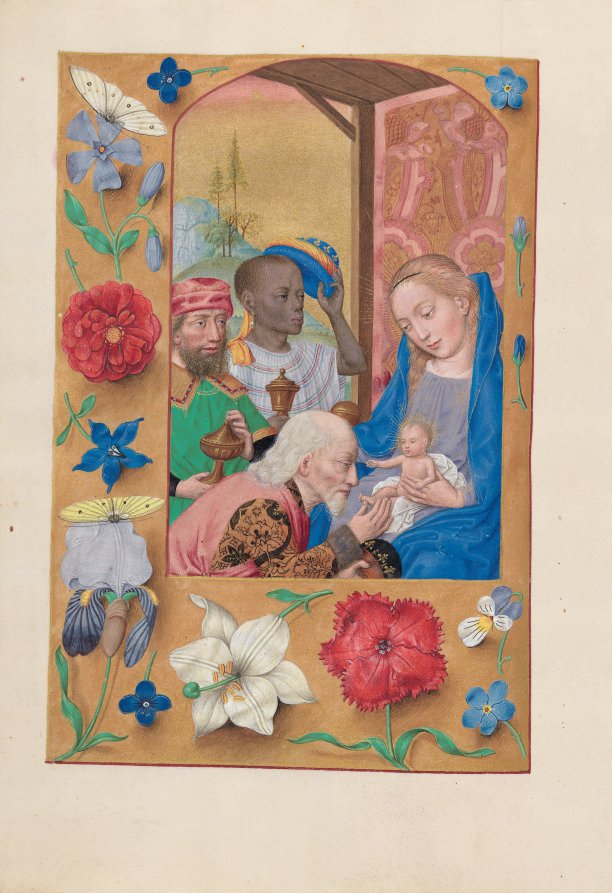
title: Hours of Queen Isabella the Catholic, Queen of Spain: Fol. 136v, Adoration of the Magi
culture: Flanders, Ghent and Bruges, late 15th century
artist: Master of the First Prayerbook of Maximillian (Flemish, c. 1444–1519)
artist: and Associates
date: c. 1500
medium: ink, tempera, and gold on vellum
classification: Bound Volume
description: This manuscript was illuminated by a circle of at least five highly organized manuscript painters active in the Flemish cities of Ghent and Bruges. The principal illuminator was Alexander Bening, who painted the majority of the book's miniatures. Manuscripts produced by this circle of artists are renowned for the decoration of their borders, which typically feature a rich variety of realistically-painted flowers, birds, and butterflies. This prayer book, called a book of hours, was intended not for a cleric, but for the private devotions of a lay person-in this case, Isabella the Catholic, Queen of Spain (1451-1504). Isabella's coat of arms embellishes the book's frontispiece. It is unlikely that the book was commissioned by the Queen herself; rather, she probably received it as a diplomatic gift from someone courting her patronage, perhaps Cardinal Francisco Jimenez de Cisneros. A Franciscan friar, Jimenez was dependent upon Isabella for his advancement, first to the post of Queen's confessor in 1492, and then to Archbishop of Toledo in 1495.